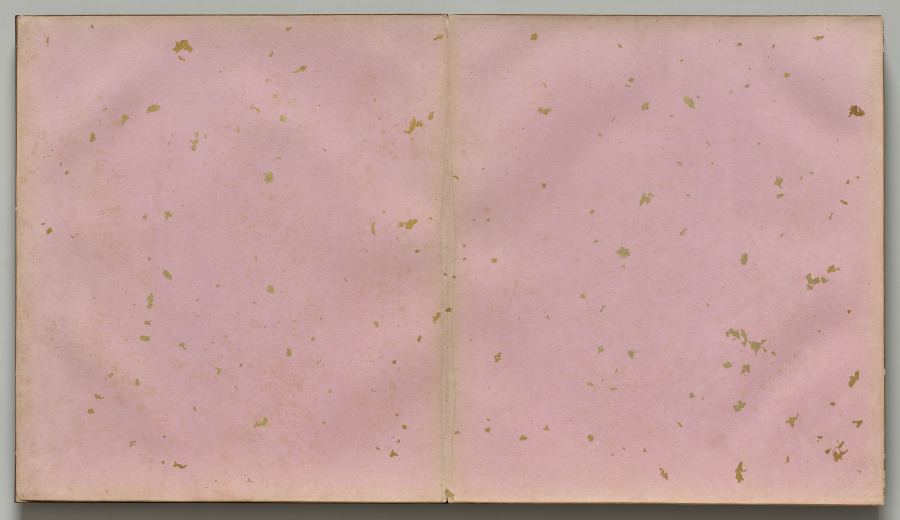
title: Absorb the Past; Abandon the Present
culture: China, Qing dynasty (1644–1911)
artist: style of Qian Hui'an (Chinese, 1833–1911)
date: 1800s–1900s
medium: Accordion-style album of 10 painted leaves; ink and color on silk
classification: Painting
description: Qian Huian, active in Shanghai, was best known for his paintings of beautiful women, and historic and mythological figures, rendered in a distinct style. His figures appear eccentric and the color palette pale to pink. The album’s title, Absorb the Past, Abandon the Present, reflect the desire to find refuge in China’s Past, as the country was going through the devastating Taiping rebellion at the time the paintings were created.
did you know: Leaf four depicts Tao Yuanming, carried by servants in a basket as he had an ailing foot. Tao wrote the Peach Blossom Spring tale, in which a fisherman loses his way and ends up in a utopia.